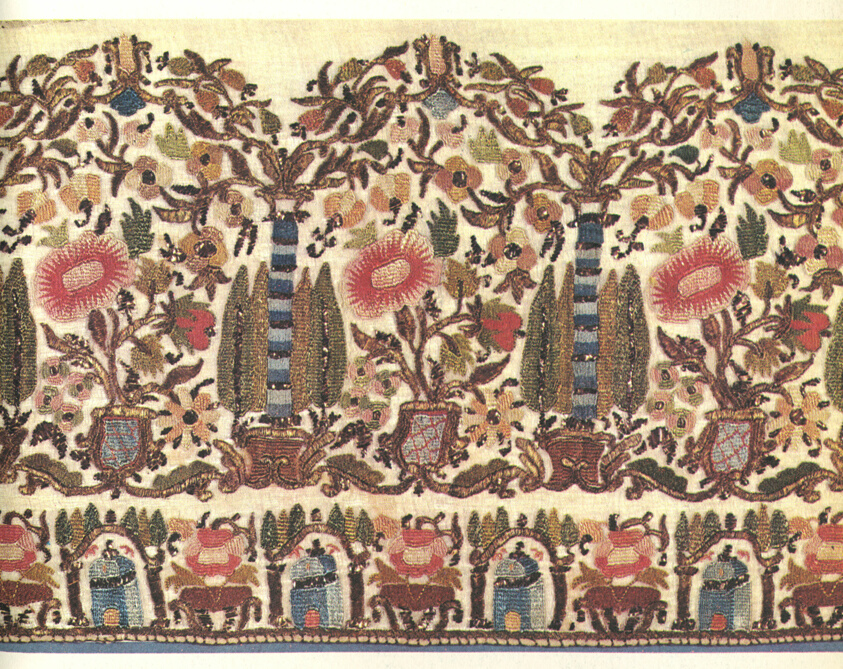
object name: Textile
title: Towel or Napkin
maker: Turkey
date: 19th century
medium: Embroidered stylized tree and floral design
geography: Turkey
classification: textile; needlework (visual works); weaving